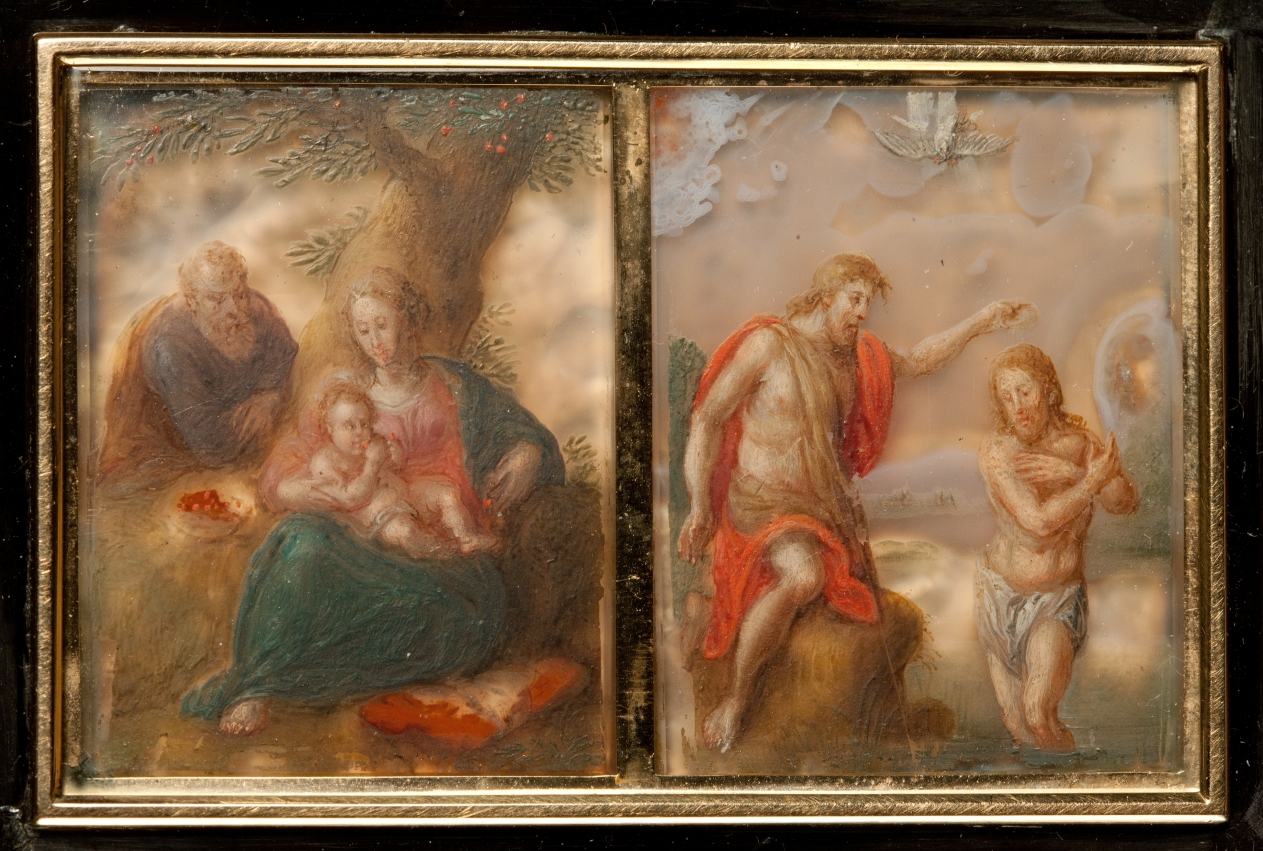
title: Snuff Box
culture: France, Paris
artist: Pierre-André Montauban (French)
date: c. 1810–20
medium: gold-mounted tortoiseshell, agate, enamel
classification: Miscellaneous